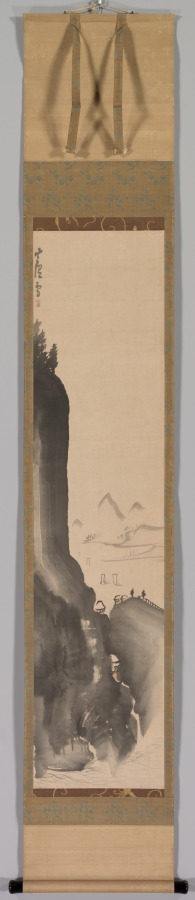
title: Mountains and Distant Boats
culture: Japan, Edo period (1615–1868)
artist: Nagasawa Rosetsu (Japanese, 1754–1799)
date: late 1700s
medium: hanging scroll; ink and slight color on paper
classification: Painting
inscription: Signed: 蘆雪; Sealed: 引裾